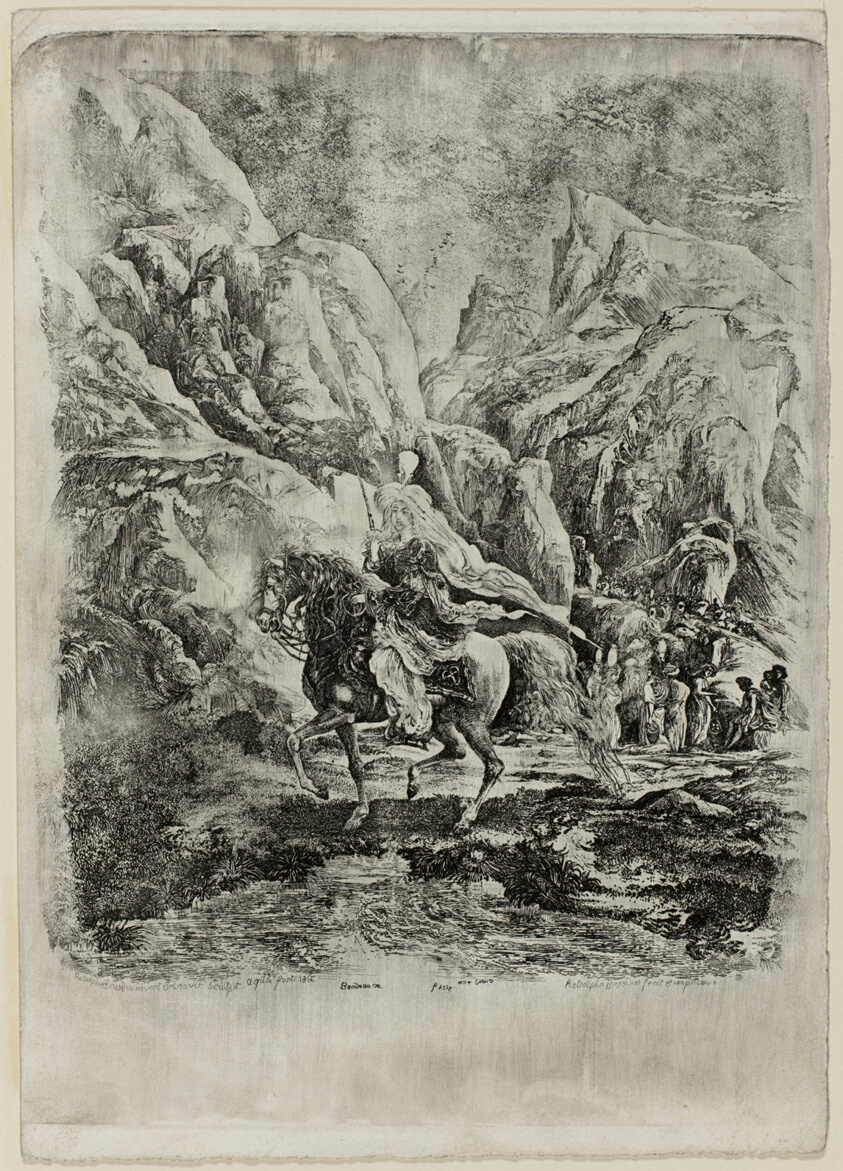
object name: Print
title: Oriental Rider in the Mountains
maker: Rodolphe Bresdin (French, 1825-1885)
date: 1866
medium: Etching and roulette on white wove paper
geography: France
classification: etching; print; prints and drawing